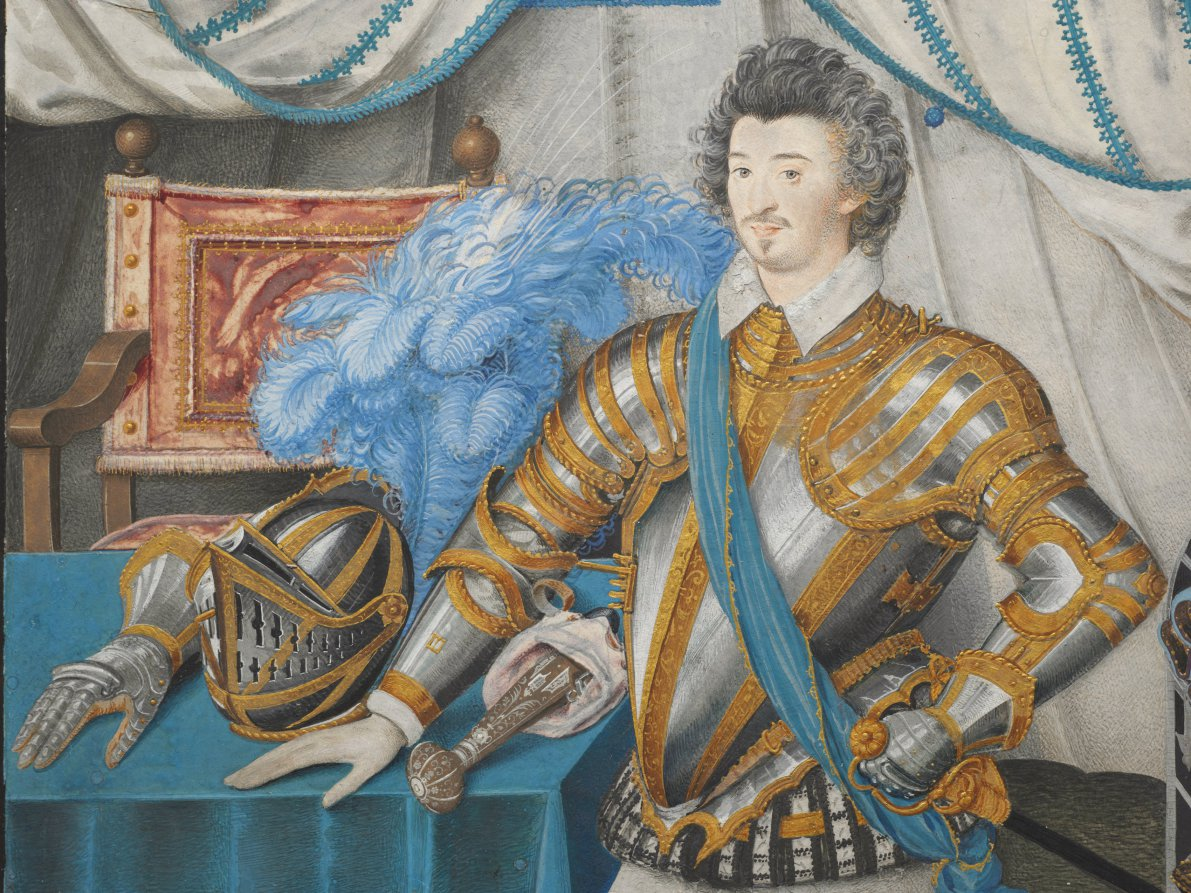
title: Sir Anthony Mildmay, Knight of Apethorpe, Northamptonshire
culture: England, 16th century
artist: Nicholas Hilliard (English, c. 1547–1619)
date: c. 1590–93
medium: Watercolor on vellum, laid on card, mounted on wood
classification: Portrait Miniature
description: Framed by the folds of a circular tent, Sir Anthony Mildmay strikes a relaxed and confident pose, with his right hand resting on a cloth-covered table and his left grasping the hilt of his thin, double-edged sword called a rapier. Helmet, gauntlet, and leg coverings are scattered about, as if Mildmay has been interrupted in the act of putting on or taking off his armor. Despite its small scale, this portrait reveals Nicholas Hilliard’s emulation of (and rivalry with) life-size court portraiture, while his meticulous attention to detail and use of costly materials like shell gold reflect the refined world of courtly tournaments.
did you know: A little dog gazes adoringly at Mildmay who was by all accounts a very arrogant man.